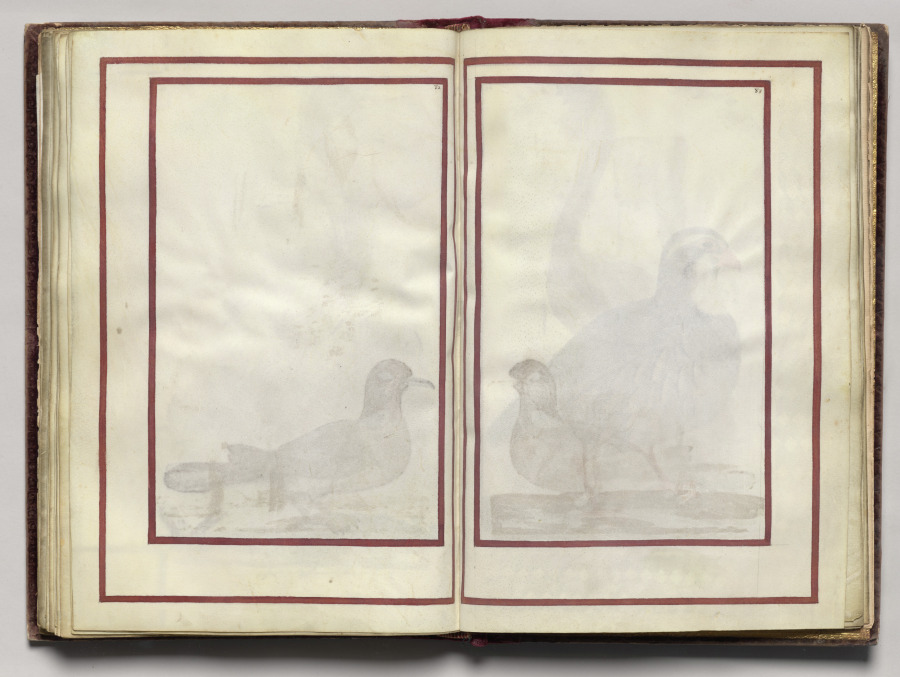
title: Border, folio 40 (recto), from Florilegium (A Book of Flower Studies)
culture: France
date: 1608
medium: watercolor, ink, silver and gold over occasional traces of pencil, on vellum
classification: Bound Volume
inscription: Dated: Poitiers 1608 (on frontispiece) Signed: On frontispiece in black ink, lower right: Van Kuyk Notation on drawing: Frontispiece: in pencil, lower margin: * élève de Van Kessel, peintre flammand (* in pencil also appears in front of Van Kuyk's name).